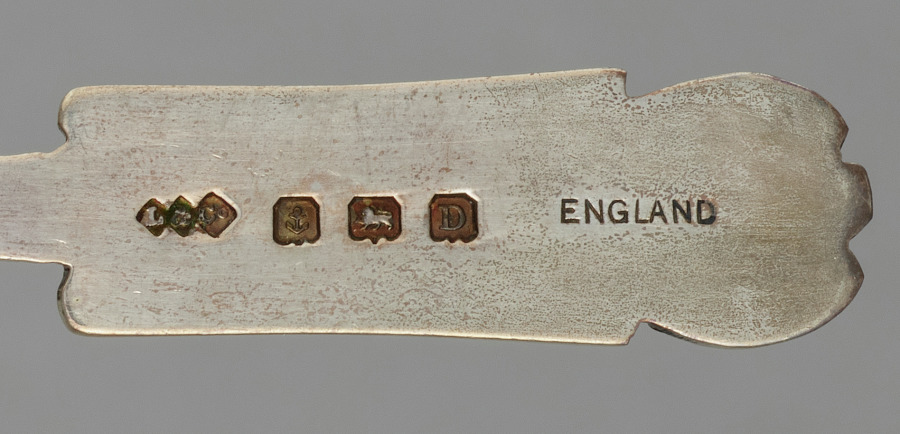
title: Set of six Spoons in Original Box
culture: England, London, 19th century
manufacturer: Liberty and Company (British)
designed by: attributed to Archibald Knox (British, 1864–1933)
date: c. 1895–1910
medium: Silver, enamel decoration and leather box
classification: Silver